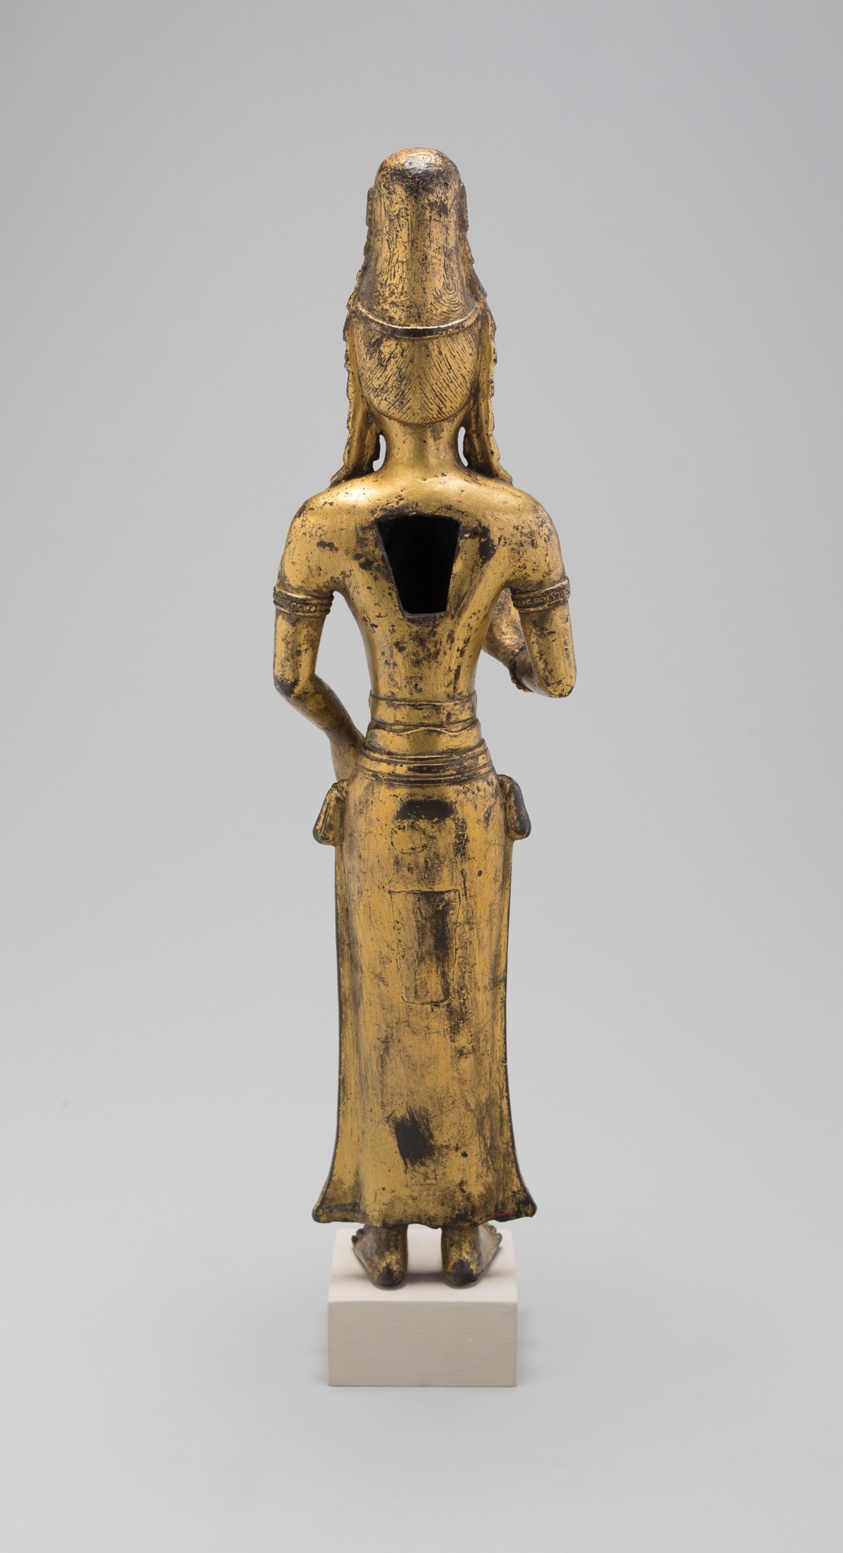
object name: Sculpture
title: Guanyin (Avalokiteshvara)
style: Chinese (culture or style)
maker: China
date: Dali kingdom (c. 937–1253), 12th century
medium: Gilt copper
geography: China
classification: bronze; metal; sculpture; asian art